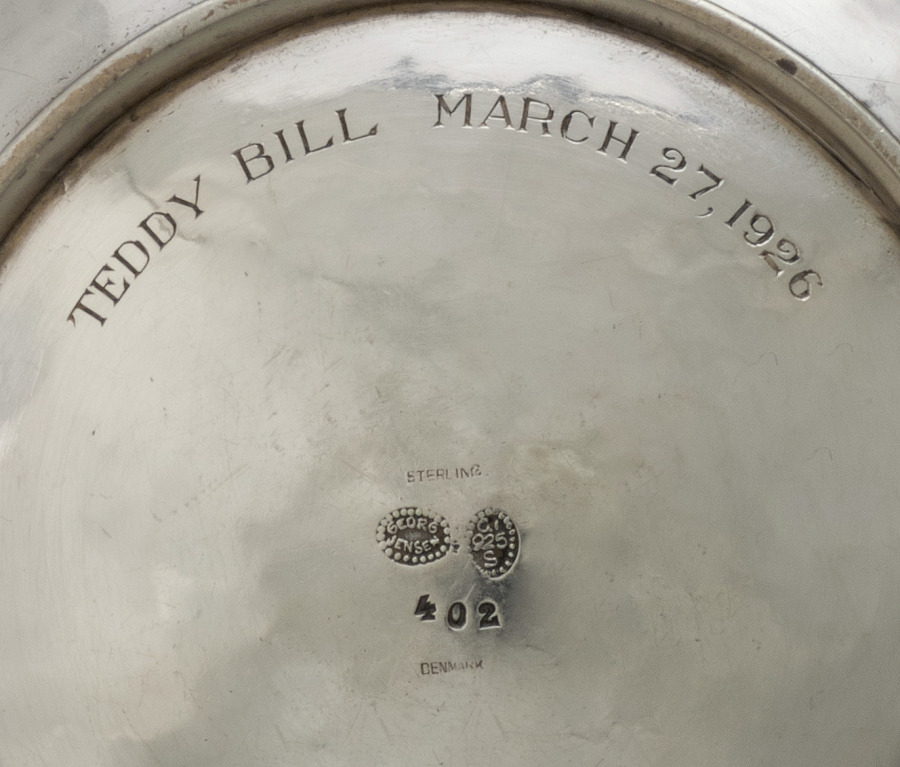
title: Bowl with Two Handles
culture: Denmark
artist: firm of Georg Jensen (Danish, 1866–1935)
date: c. 1925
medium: silver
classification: Silver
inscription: engraved on bottom: "TEDDY BILL MARCH 27, 1926."